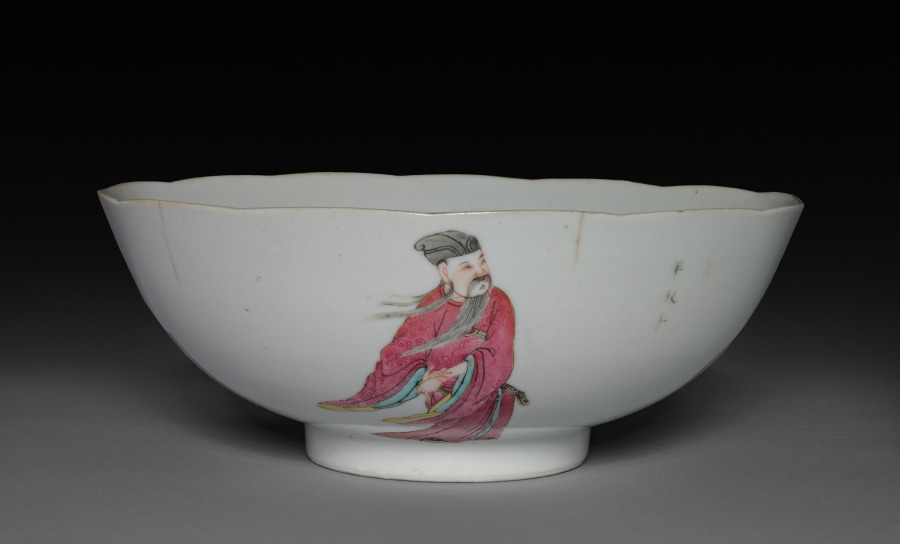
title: Bowl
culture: China, Qing dynasty (1644-1911)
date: 1821–1850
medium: porcelain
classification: Ceramic